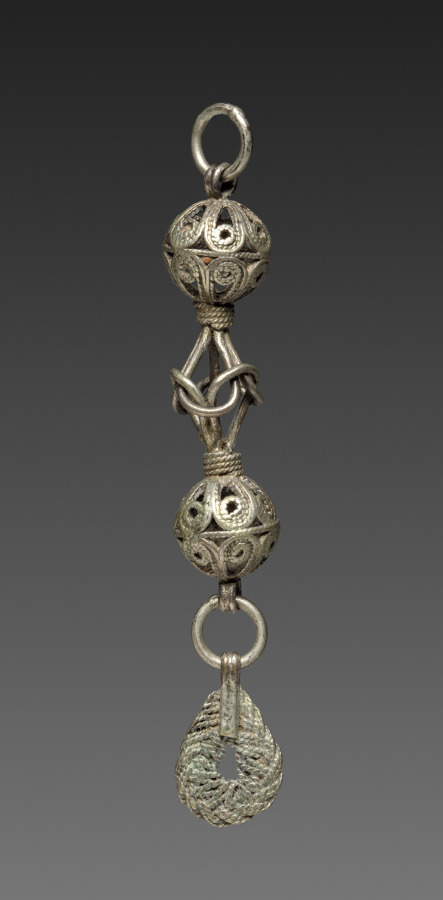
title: Button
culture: Balkans, 19th century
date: 1800s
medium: silver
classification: Jewelry